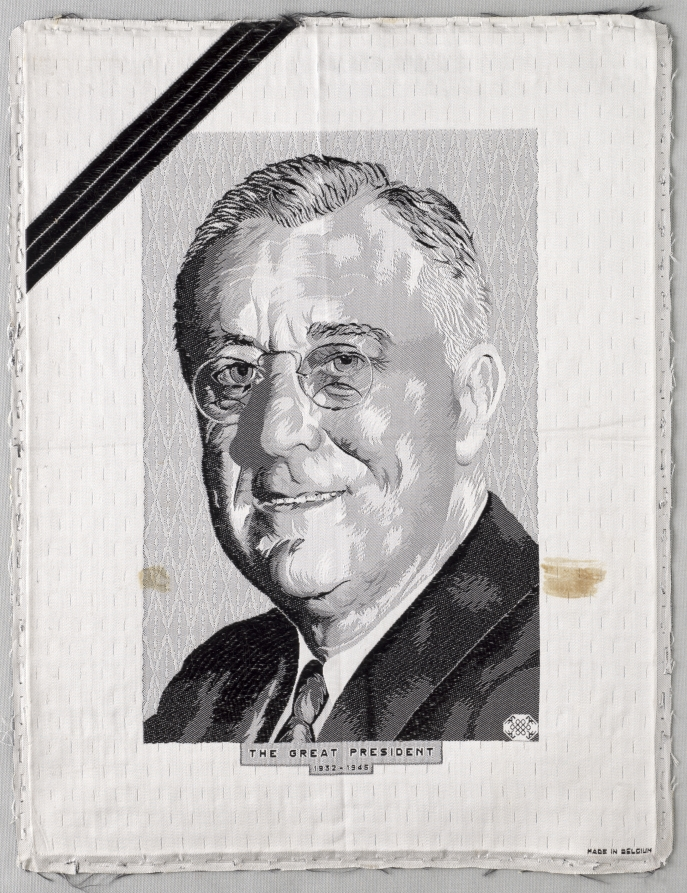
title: The Great President: 1932-1945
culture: Belgium, 20th century (?)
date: 1900s (?)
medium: jacquard weave silk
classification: Textile